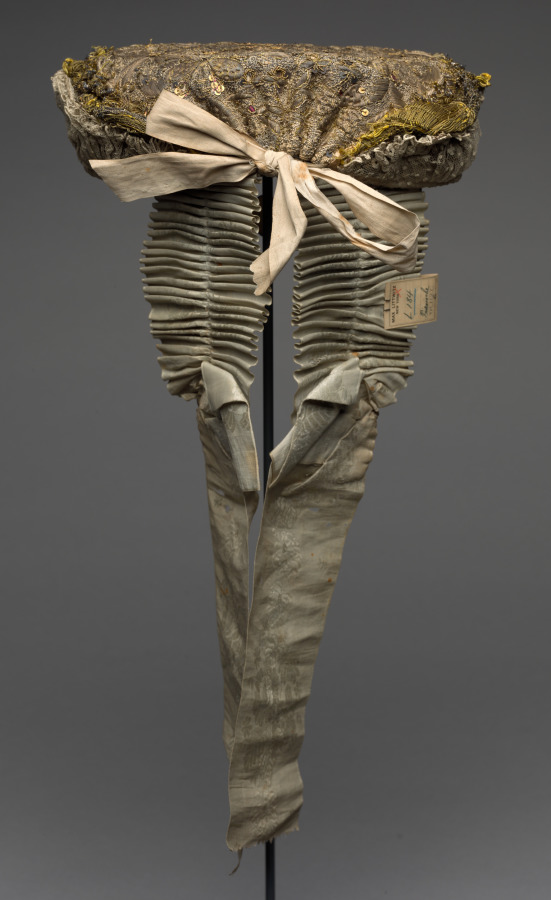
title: Embroidered Headdress (Called "Triesische")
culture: Germany, 18th century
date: 1700s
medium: embroidery, metallic thread and spangles; lace edging and ribbon streamers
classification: Garment